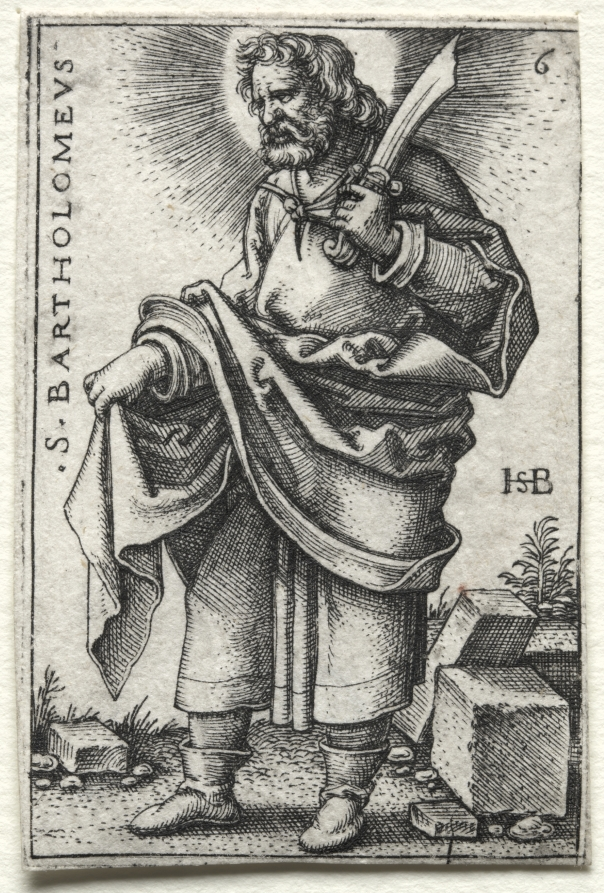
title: St. Bartholomew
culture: Germany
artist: Hans Sebald Beham (German, 1500–1550)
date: 1545–1546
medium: engraving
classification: Print